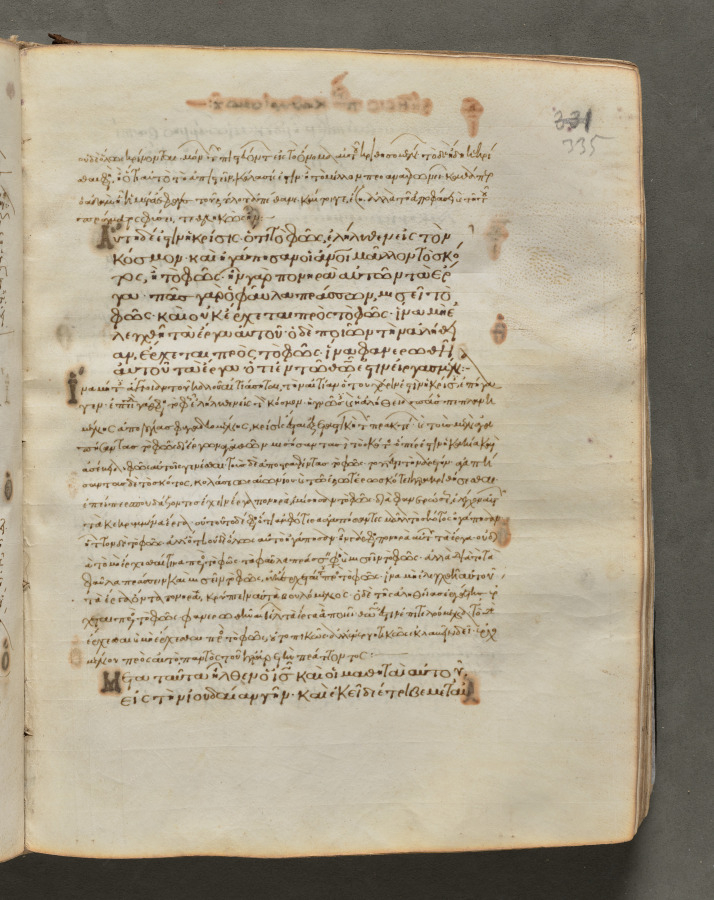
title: Text, folio 335 (recto), from a Gospel Book with Commentaries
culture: Byzantium, Constantinople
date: c. 1000–1100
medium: ink, tempera, and gold on vellum; leather binding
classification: Bound Volume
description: Each of the four gospels in this book opens on a page with brilliantly illuminated borders depicting the author of the text as well as birds—principally peacocks, symbols of the immortality of the soul—and fountains, representing the fountain of life and the salvation of the soul. This volume consists of 428 leaves with texts in Greek. Its level of sophistication suggests that it was probably written and decorated in a monastery in Constantinople.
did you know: Gospel books were carried in procession through Byzantine churches.